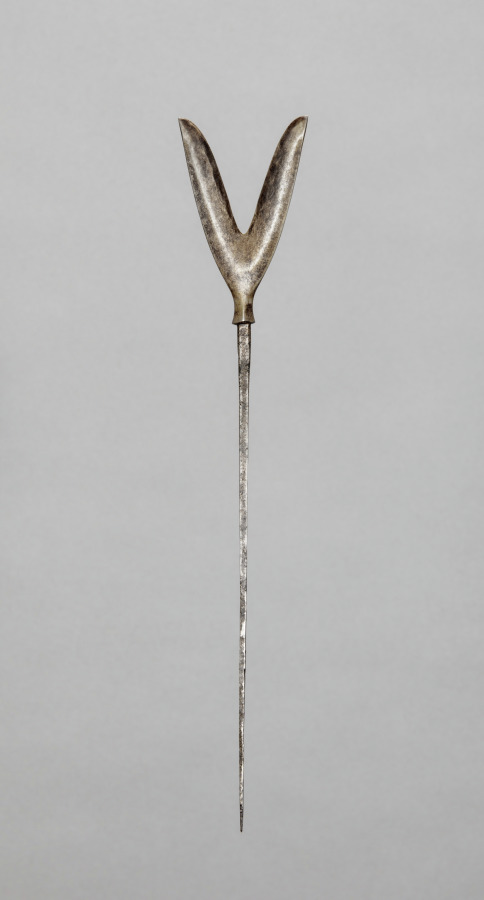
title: Arrow Point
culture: Japan, Edo period (1615–1868)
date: 1700s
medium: steel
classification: Arms and Armor